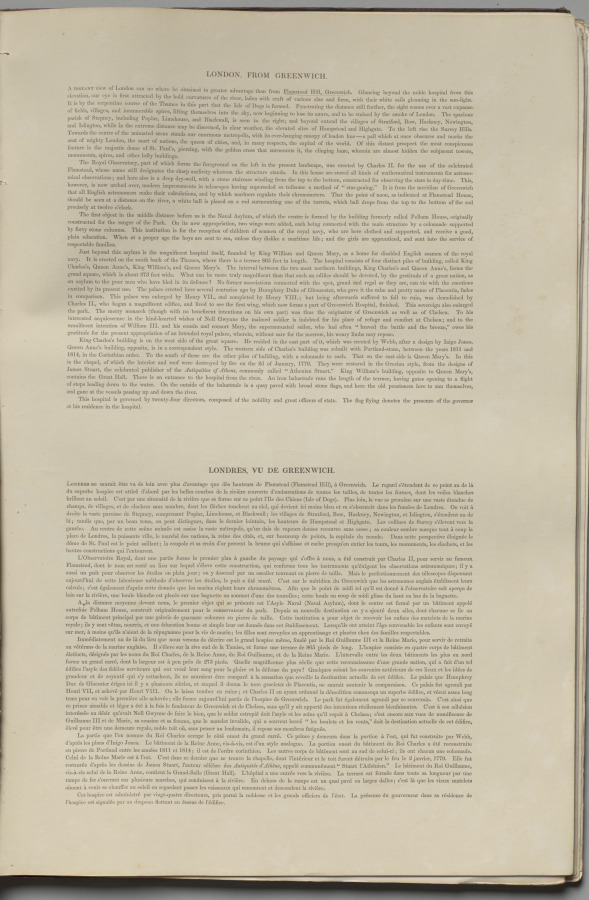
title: London As It Is: from Greenwich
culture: England, 19th century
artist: Thomas Shotter Boys (British, 1803–1874)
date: 1842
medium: lithograph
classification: Bound Volume